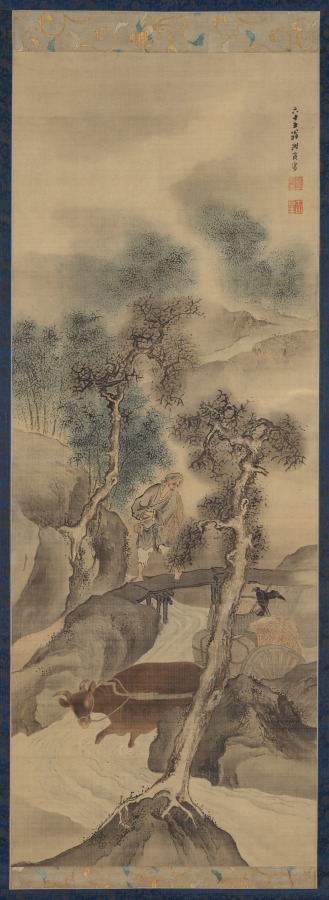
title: Farmer Returning Home in Autumn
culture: Japan, Edo period (1615–1868)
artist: Yosa Buson (Japanese, 1716–1783)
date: 1781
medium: Hanging scroll; ink and light color on silk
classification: Painting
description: Here, Yosa Buson’s farmer playfully chastises a crow who has come to dine on his grain while his water buffalo earnestly negotiates a swift stream. Raised in what is now Osaka, Buson went to Edo (now Tokyo) to study poetry composition. He later traveled around northeastern Japan, following in the footsteps of poet Matsuo Bashō (松尾芭蕉) (1644–1694), and then taught poetry in Kyoto. He painted professionally, a skill he learned by using wood-block–printed Chinese painting manuals.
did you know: The man keeps his feet dry by crossing over the bridge while the water buffalo pulls the cart through the stream.